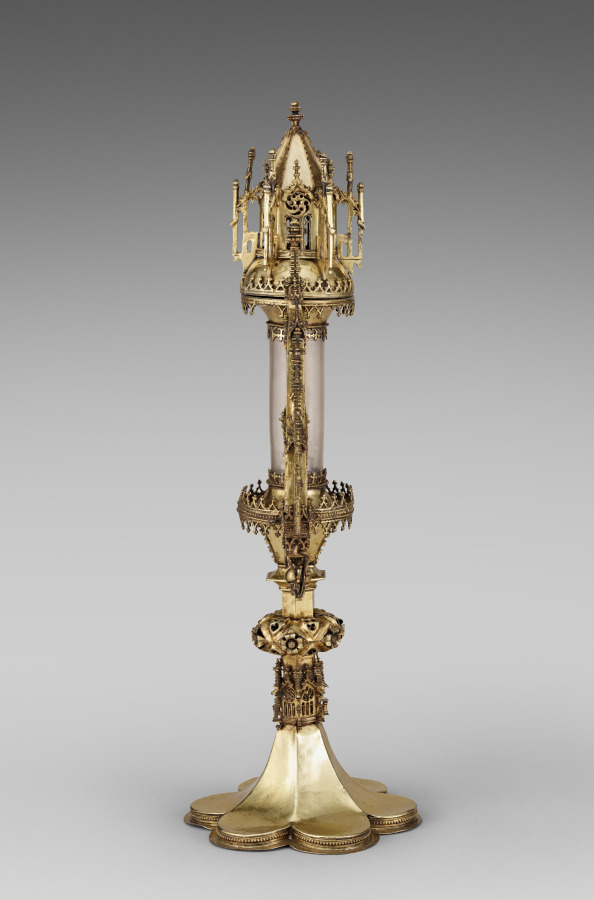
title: Monstrance with a Relic of Saint Sebastian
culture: Germany, Lower Saxony, Brunswick, Gothic period, 15th century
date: 1484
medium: gilded silver, rock crystal, bone, parchment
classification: Metalwork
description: This Late Gothic monstrance (from the Latin monstrare, "to show") is mentioned in the earliest inventory of Saint Blaise as "a large new monstrance containing relics of Saint Sebastian the martyr." Judging from surviving receipts, the reliquary was made by Werner Korff, a local goldsmith, who received payments for silver and gilding at the end of 1484. The reliquary was first displayed on the altar of the church of Saint Blaise in a solemn penitential mass on June 4, 1484, in an effort to ward off the plague. A recent examination revealed that the relic is a human metatarsal bone (one of five long bones of the human foot) and that its owner seemed to have suffered from periostitis, a medical condition that affects the connective tissue surrounding the bone.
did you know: In the Middle Ages, people suffering from diseases might make a journey, or pilgrimage, to venerate relics such as this one. The faithful believed that the remains of saints and holy people like Saint Sebastian could help those seeking aid such as relief from the plague.